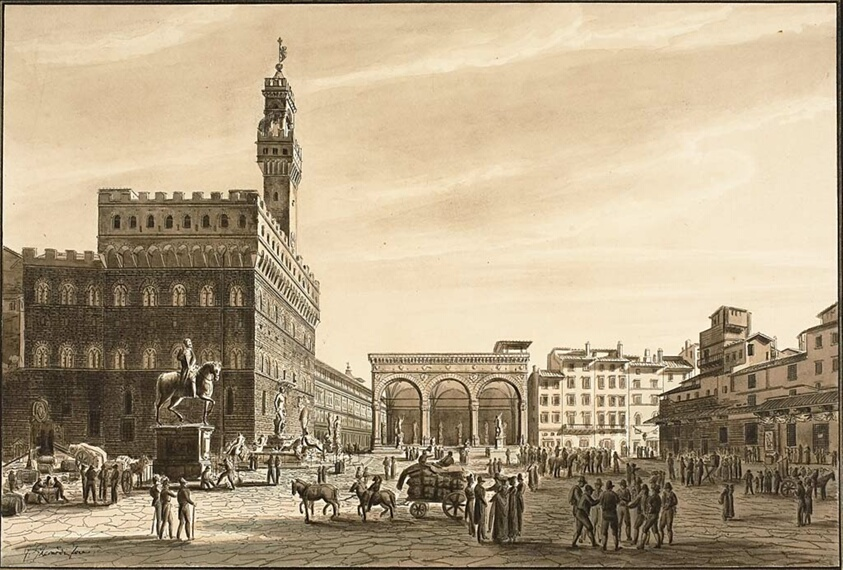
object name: Drawing and Watercolor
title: Piazza Signoria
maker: Giuseppe Gherardi (Italian, 1788/90-1884)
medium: Pen and black ink and brush and brown and gray wash, with touches of pale blue and pink wash, on cream wove paper, laid down on cream laid card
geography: Italy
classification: ink or chalk wash; drawings (visual works); prints and drawing